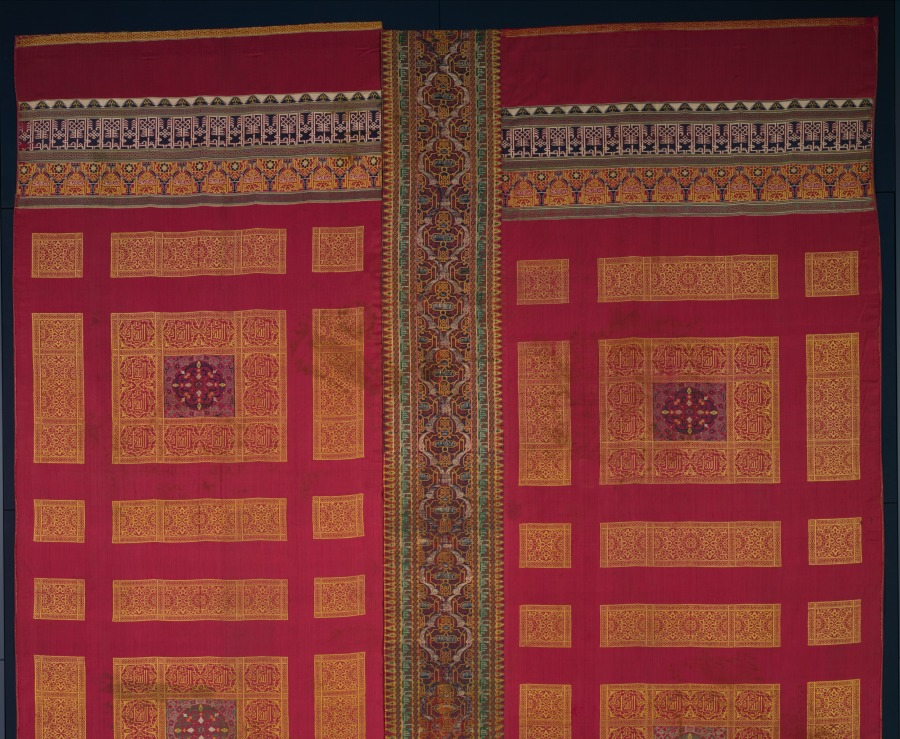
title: Silk curtain from the Alhambra palace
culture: Spain, Granada, Nasrid period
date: 1300s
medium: lampas and taqueté: silk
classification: Textile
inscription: the bold knotted Kufic inscription in the top and bottom borders of the side panels repeats the Arabic word "felicity." Within the arches forming a frieze in the top border is a Kufic inscription "good fortune" and a Naskhi inscription repeating trhe motto of the Nasrid dynasty, "There is no conqueror but God." In the borders of the three large ornamental rectangles on each side panel is the Naskhi inscription "Dominion belongs to God alone." On the central panel the inscriptions in the borders repeat the phrase, "Majestry is God's," while the Nasrid motto, "There is no conqueror but God" and, above, "Blessing," are inscribed in the arabesque ogives.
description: This is one of two of the largest, most complete, and most ornate curtains to survive from the 1300s when it presumably hung in the royal Alhambra Palace in Granada, the last Muslim stronghold in Spain. Its style, artistic vocabulary, and harmonious proportions reflect the magnificent wall decoration in the Alhambra. The motto of the ruling Nasrid dynasty, "There is no conqueror but God," is inscribed in the end borders and central panel. The inscribed striped silk forming the central panel is more worn, suggesting that it was recycled, most likely during the 1300s.